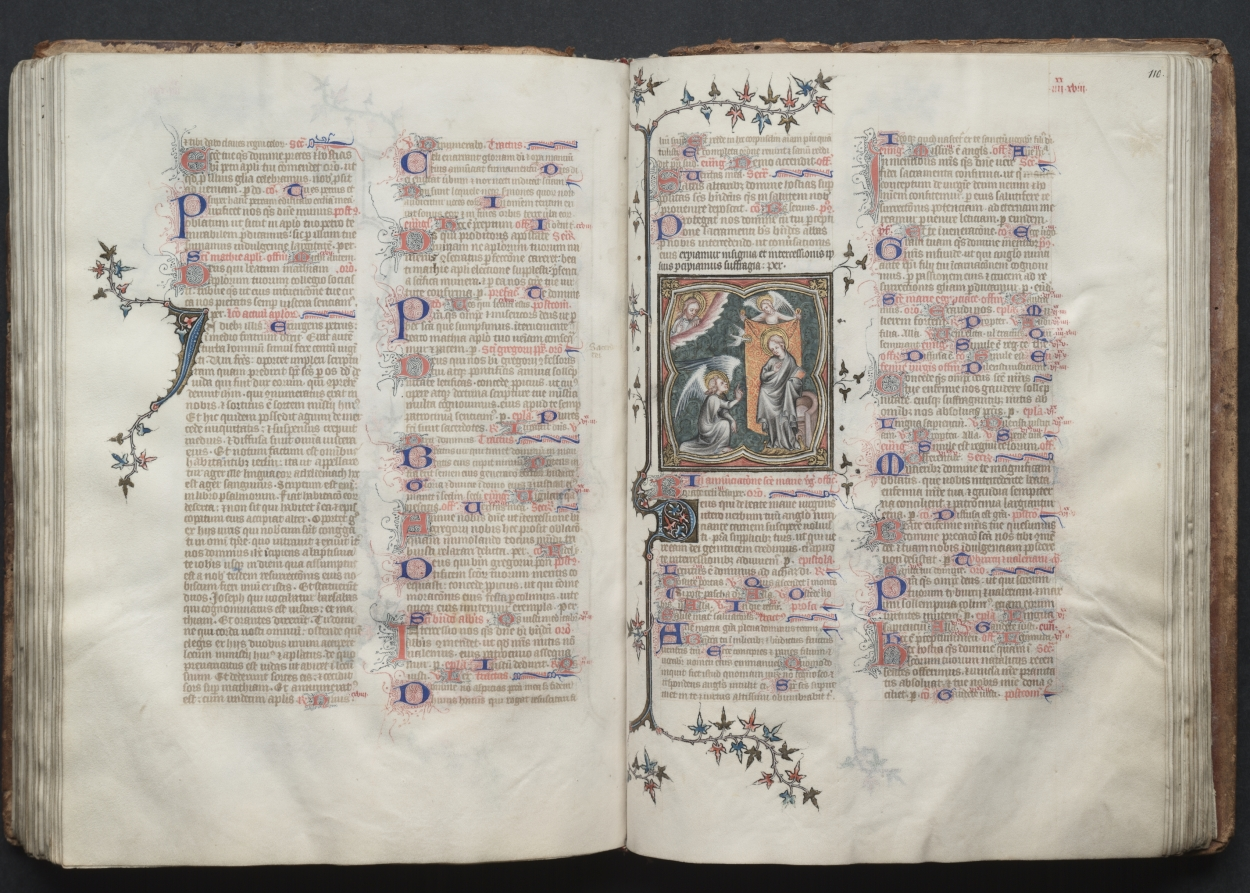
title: The Gotha Missal: Fol. 109v, Text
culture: France, Paris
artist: Master of the Boqueteaux (French)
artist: and Workshop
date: c. 1375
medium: ink, tempera, and gold on vellum; blind-tooled leather binding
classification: Bound Volume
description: The style and quality of this manuscript's decoration is typical of deluxe Parisian books made for aristocratic or royal patrons. Most of the book's decoration appears to be the work of the Master of the Boqueteaux, an artist active at the court of King Charles V (died 1380). His style was apparently shared by a number of book illuminators working in and around Paris. It is very possible that the Gotha Missal belonged to Charles V, but is not provable because the manuscript has no royal portraits and lacks a colophon. Given the book's magnificent decoration, however, it would seem that it was produced for a Valois prince, if not for the king himself. The manuscript receives its name from the German dukes of Gotha, its later owners.